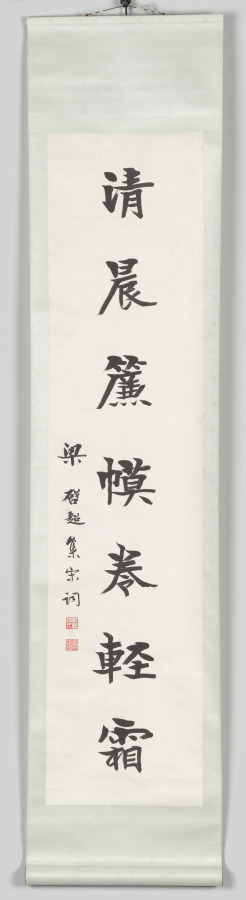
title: Left Scroll from Calligraphy Couplet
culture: China, Republican period (1912-49)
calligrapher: Liang Qichao (Chinese, 1873–1929)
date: after 1911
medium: One of a pair of hanging scrolls; ink on paper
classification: Calligraphy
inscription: 永夜鬧皆臥桂影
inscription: 旨徽仁兄雅心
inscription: 清晨簾幕卷輕霜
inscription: 梁啟超筆宋詞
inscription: [印] 新會梁氏. [印] 啓超和印.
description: The prominent politician and modern reformer Liang Qichao writes here in an angular, firm, and little modulated regular script style, inspired by inscriptions incised on ancient stone steles. Those script styles were popular among reformers of the time, as they sought to revive the ancient culture and built a new China on the country’s strong ancient foundations. Each scroll cites the verse of a historic cultural figure in Chinese history.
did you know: Liang Qichao aimed to reform the country and strengthen its foundations through the revival of the ancient culture of China.